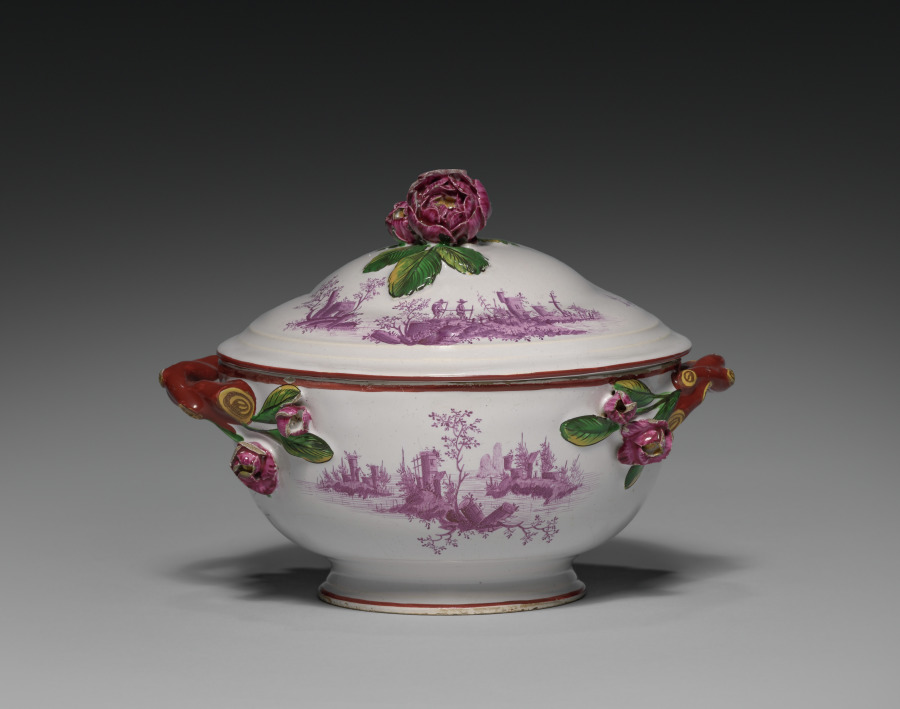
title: Covered Bowl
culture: France, 18th century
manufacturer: Saint-Clément Factory (French)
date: c. 1775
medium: tin-glazed earthenware (faience) with enamel decoration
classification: Ceramic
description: The faience factory at Saint-Clément in eastern France closely imitated the styles and techniques employed by the Hannong's at Strasbourg. The monochrome landscapes in red on this covered bowl demonstrate the influence of German, in this case Meissen, porcelain on the faience made in this part of France.